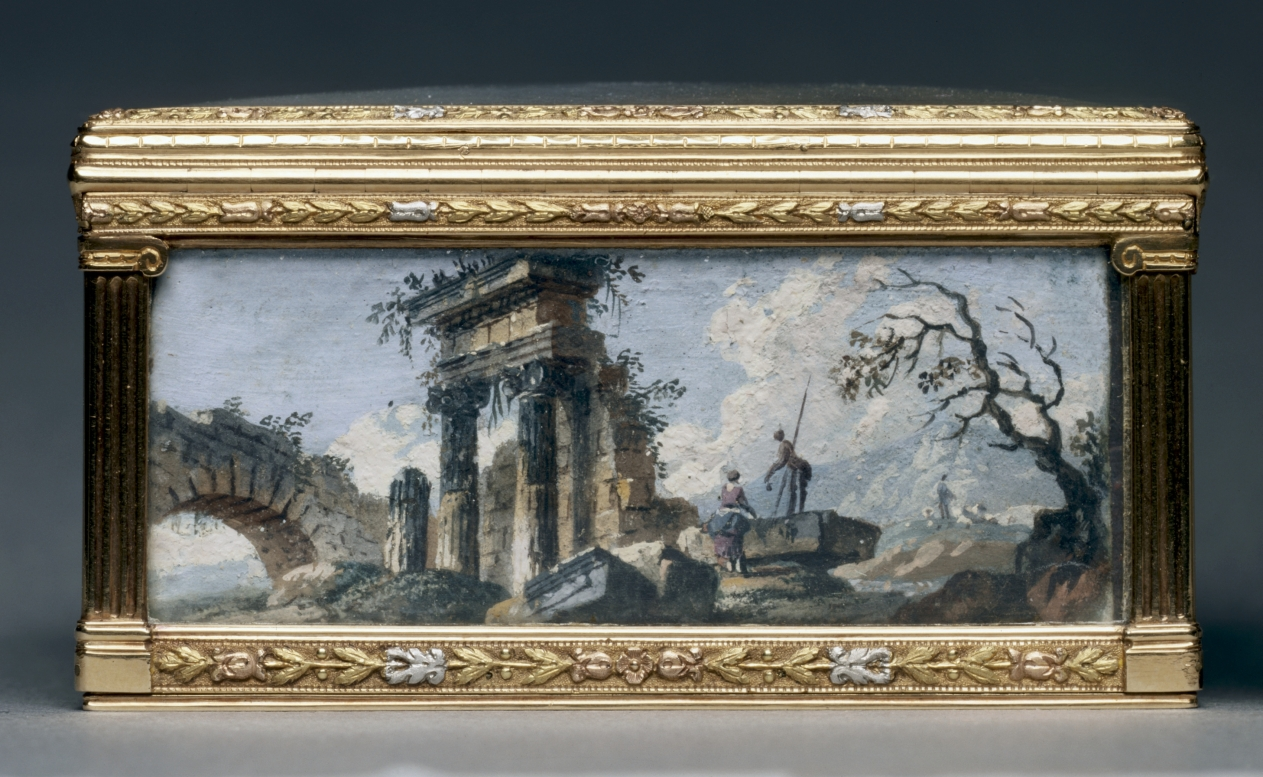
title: Rectangular Box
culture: France, 19th century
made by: Alexandre Leferre (French)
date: c. 1840–1850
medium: gouache miniatures mounted on gold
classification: Miscellaneous